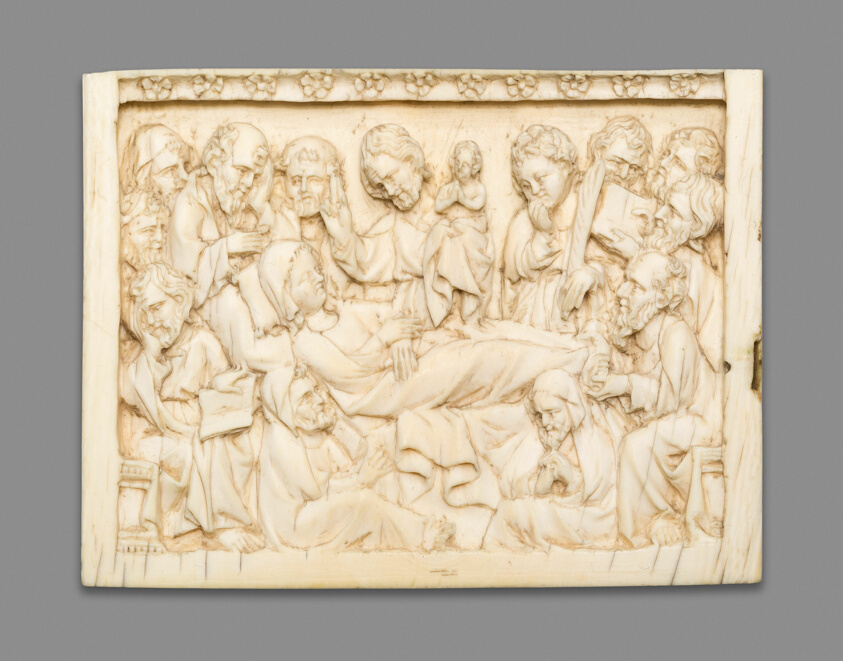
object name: Sculpture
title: Diptych Fragment: The Death of the Virgin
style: 14th century, 15th century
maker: Attributed to the Master of Kremsmünster (German, active 1375–1400)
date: 1375/1400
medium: Ivory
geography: Germany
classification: relief; sculpture; carving; german; ivory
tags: death, children, bed, prayer, Mourning, men, woman, Christian subjects, Christianity, religious scenes, religious figures, religious, religion, Virgin Mary